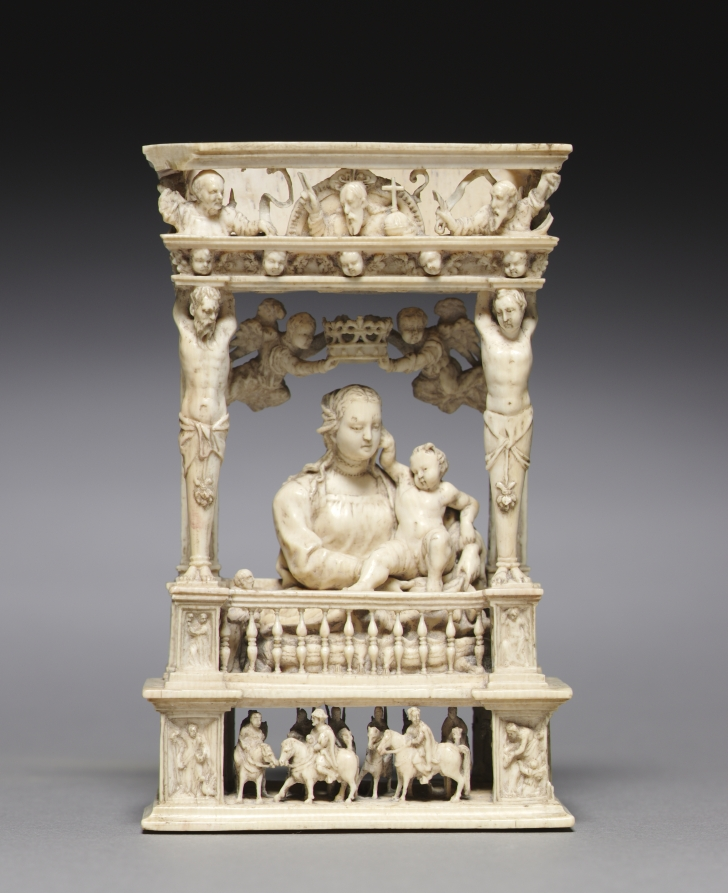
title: Virgin and Child in an Architectural Frame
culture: Flanders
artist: style of Jan Gossaert (Flemish, c. 1475/78–1532)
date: c. 1530–40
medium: ivory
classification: Sculpture